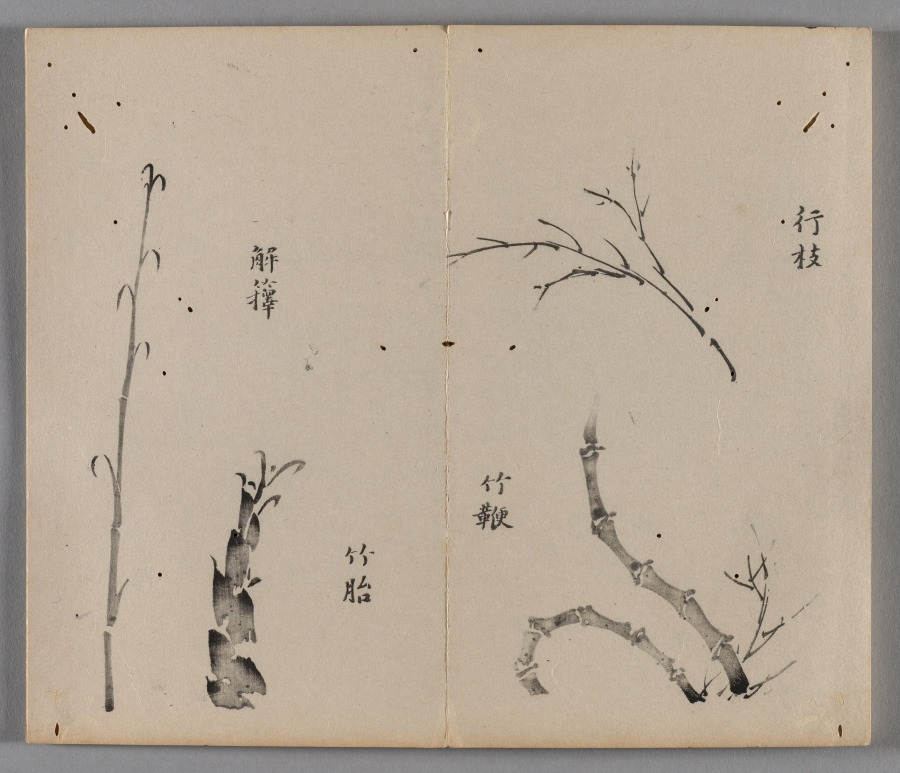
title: Ten Bamboo Studio Painting and Calligraphy Handbook (Shizhuzhai shuhua pu): Bamboo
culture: China, Qing dynasty (1644-1911)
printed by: Hu Zhengyan (Chinese, c. 1584–1674)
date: 1633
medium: Woodblock-printed book; ink and colors on paper; first edition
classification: Print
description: Color printing reached a level of perfection in the early 1600s, as seen in this Ten Bamboo Studio Collection of Calligraphy and Painting and the Mustard Seed Garden Manual of Painting (printed 1679 and 1701). The painterly quality, precision in registering (aligning) the woodblocks, and harmonious colors made them the most successful color print editions in Chinese history. Both editions were printed and compiled in Nanjing, spread nationwide, and had a great impact on the arts in Japan and Korea.